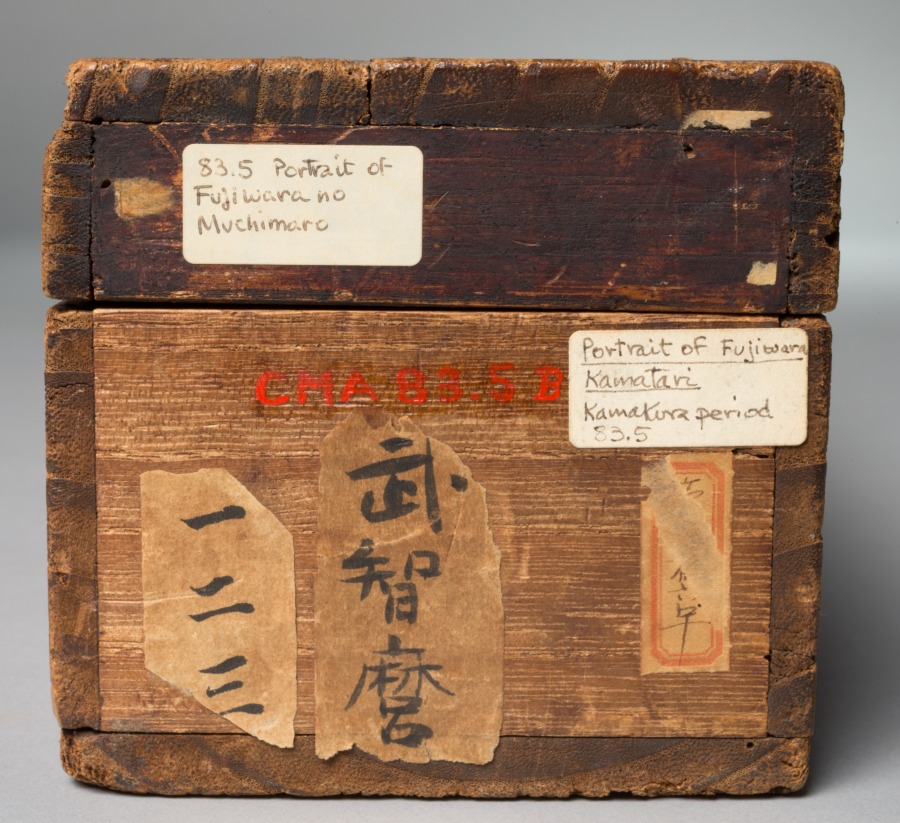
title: Fujiwara no Muchimaro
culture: Japan, Kamakura period (1185–1333)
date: 1200s or 1300s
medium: Hanging scroll; ink, color, gold, and cut gold on silk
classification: Painting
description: This portrait of Fujiwara no Muchimaro (680–737), a grandson of Fujiwara no Kamatari (614–669), includes an image of Buddha Dainichi Nyorai above his head. By situating the image of Dainichi there, this painting would seem to assert that Muchimaro is an avatar of Dainichi. In the same way that kami could be identified with Buddhist counterparts, powerful humans could also be seen as manifestations of Buddhist deities. A similar painting is at Eizanji in Nara, of which Muchimaro is known as the founder. It was once a branch temple of Kōfukuji, the Fujiwara family temple.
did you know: The boughs of wisteria appearing in the background symbolize the figure's status as a Fujiwara family member.